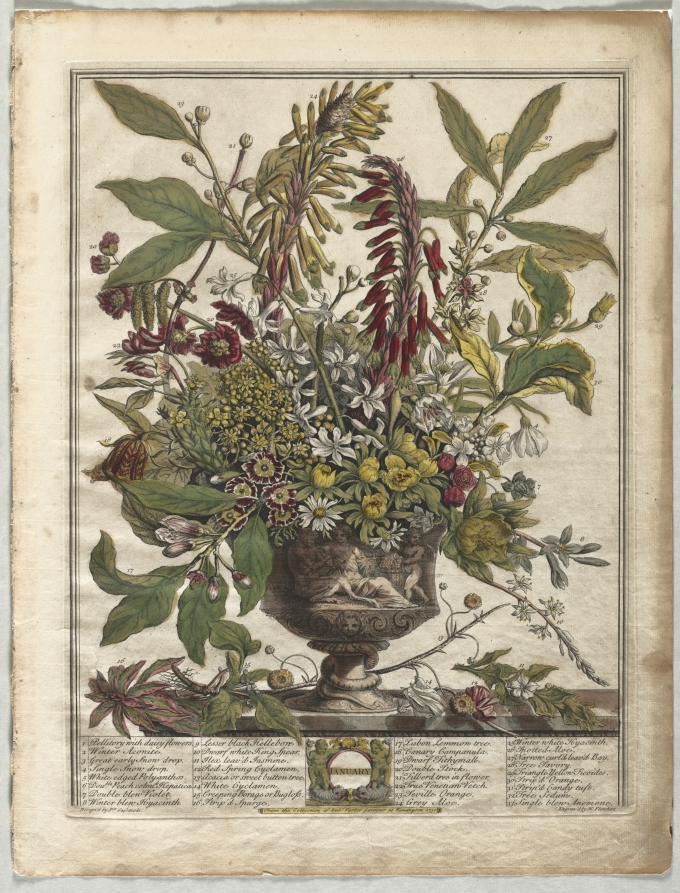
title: Twelve Months of Flowers: January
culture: England, 18th century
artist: Henry Fletcher (British, active 1715–38)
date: 1730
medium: engraving, hand-colored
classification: Print